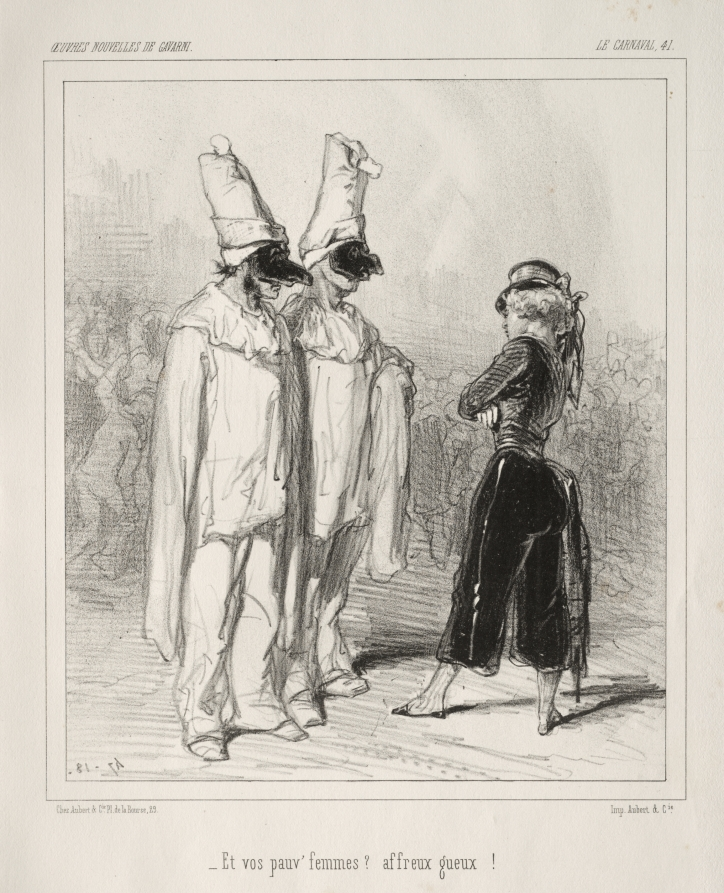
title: Carnaval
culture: France, 19th century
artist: Paul Gavarni (French, 1804–1866)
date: c. 1841–47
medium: lithograph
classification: Print